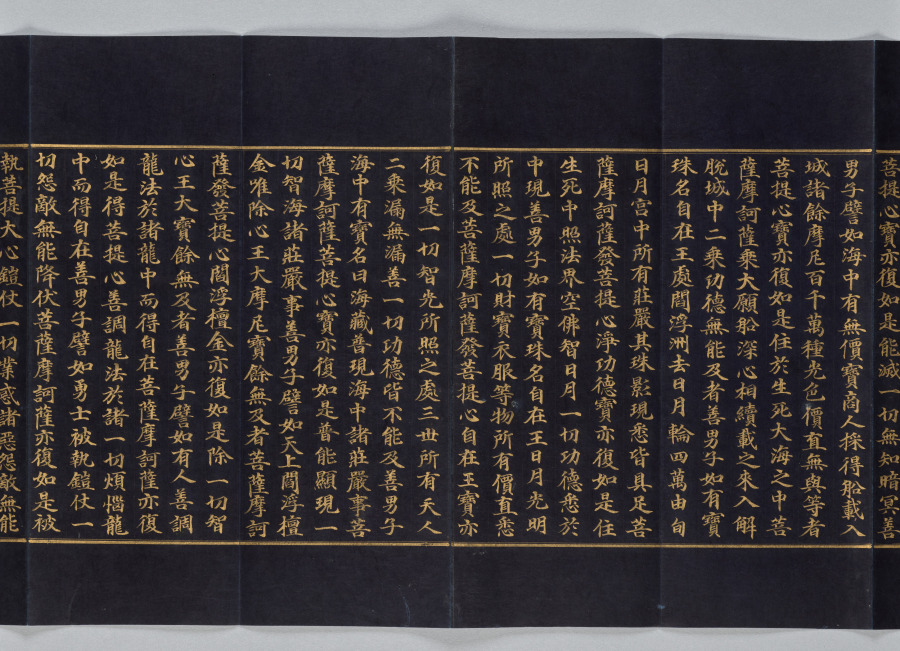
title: Avatamsaka Sutra No. 78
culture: Korea, Goryeo dynasty (918–1392)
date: 1300s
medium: Folded book with illustrated frontispiece; gold and silver on mulberry paper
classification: Bound Volume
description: This illuminated manuscript presents one part of the multivolume sacred text titled Avatamsaka (Flower Garland) sutra. Both the script and the image are rendered in gold ink on the smooth surface of the dark blue, indigo-dyed mulberry paper. This portion of the text, which reads from right to left, describes the encounter of the Buddha of the Future (Maitreya) and the young pilgrim Sudhana. The Buddha gives his words of wisdom to Sudhana, who asks questions about the path toward spiritual awakening. Mixed with ink and glue, the gold has a brilliance that strikingly reflects Sudhana’s ardent quest for understanding the way to reach enlightenment.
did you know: The pristine condition of this manuscript indicates that it was rarely used after its creation, revealing that the act of making a manuscript rather than reading it was the main religious goal.